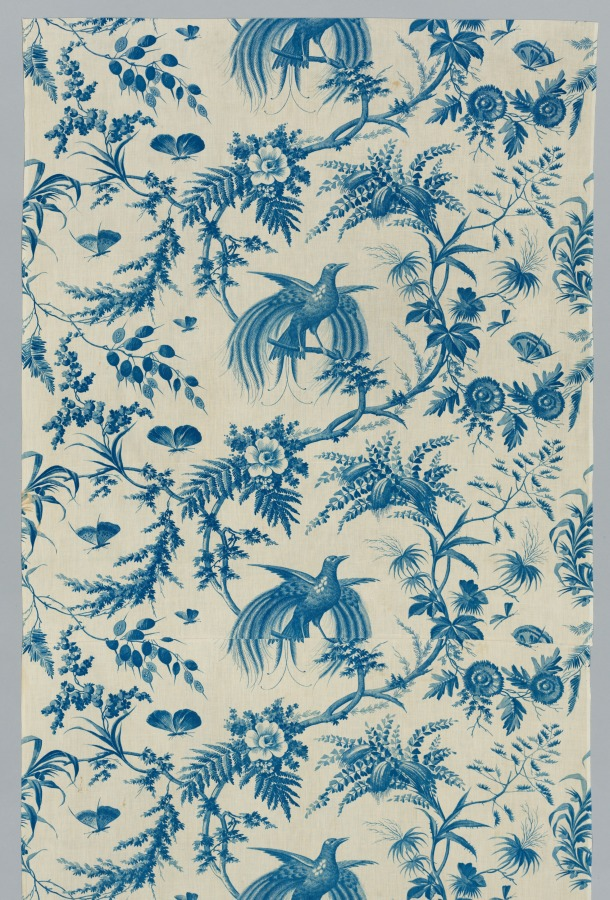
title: Strip of Copperplate Printed Cotton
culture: France, early 19th century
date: early 1800s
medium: copperplate printed cotton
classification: Textile